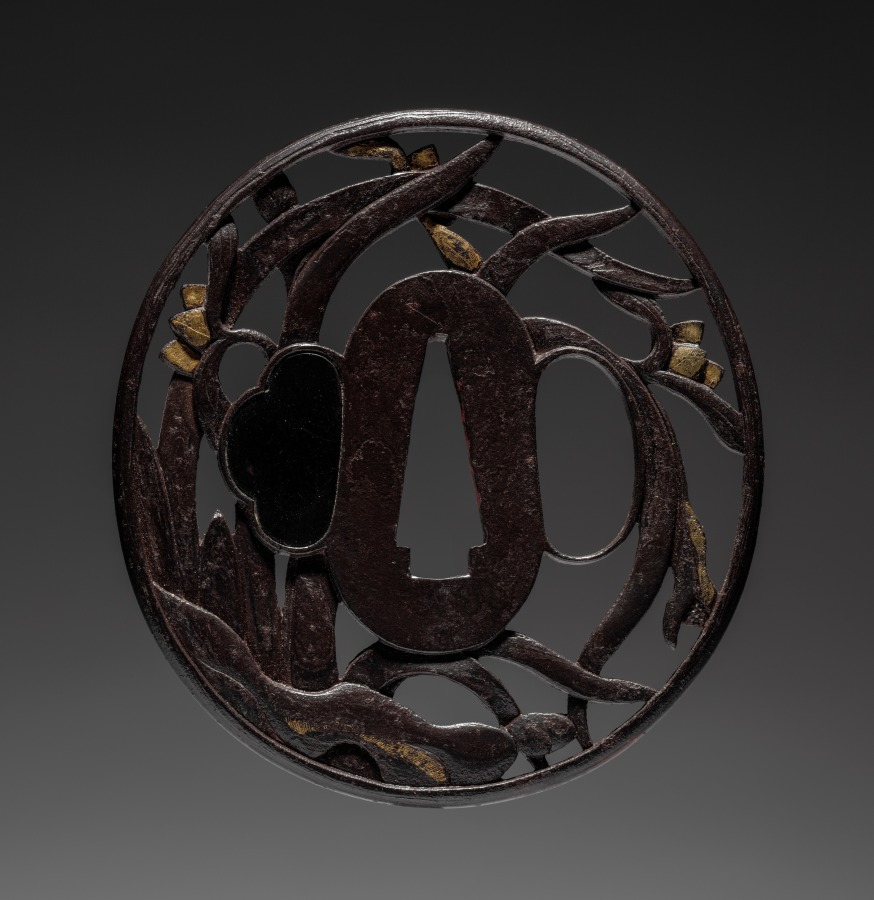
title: Sword Guard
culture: Japan, Edo period (1615–1868)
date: 1615–1868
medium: iron (Choshu type)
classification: Arms and Armor